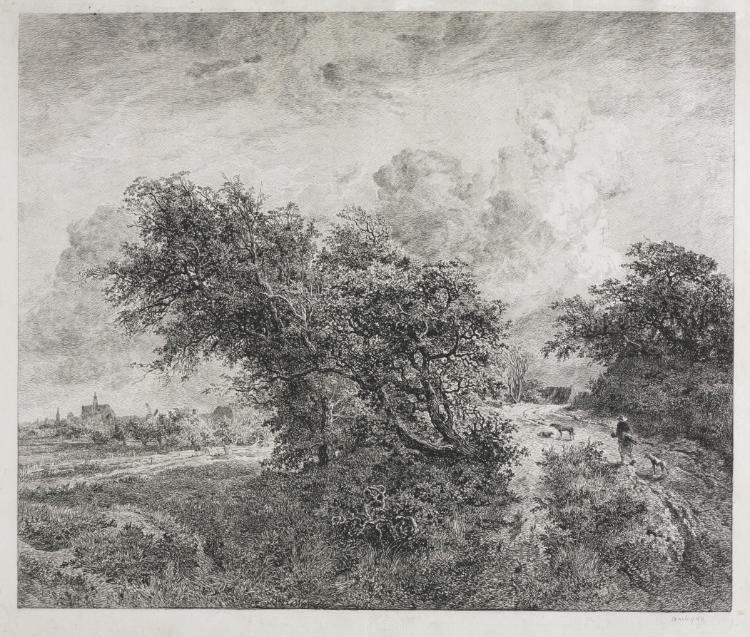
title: The Thicket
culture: France, 19th century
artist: Charles François Daubigny (French, 1817–1878)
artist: after Jacob van Ruisdael (Dutch, 1628/29–1682)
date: 1855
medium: etching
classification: Print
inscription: signed, lower right, in plate: Daubigny